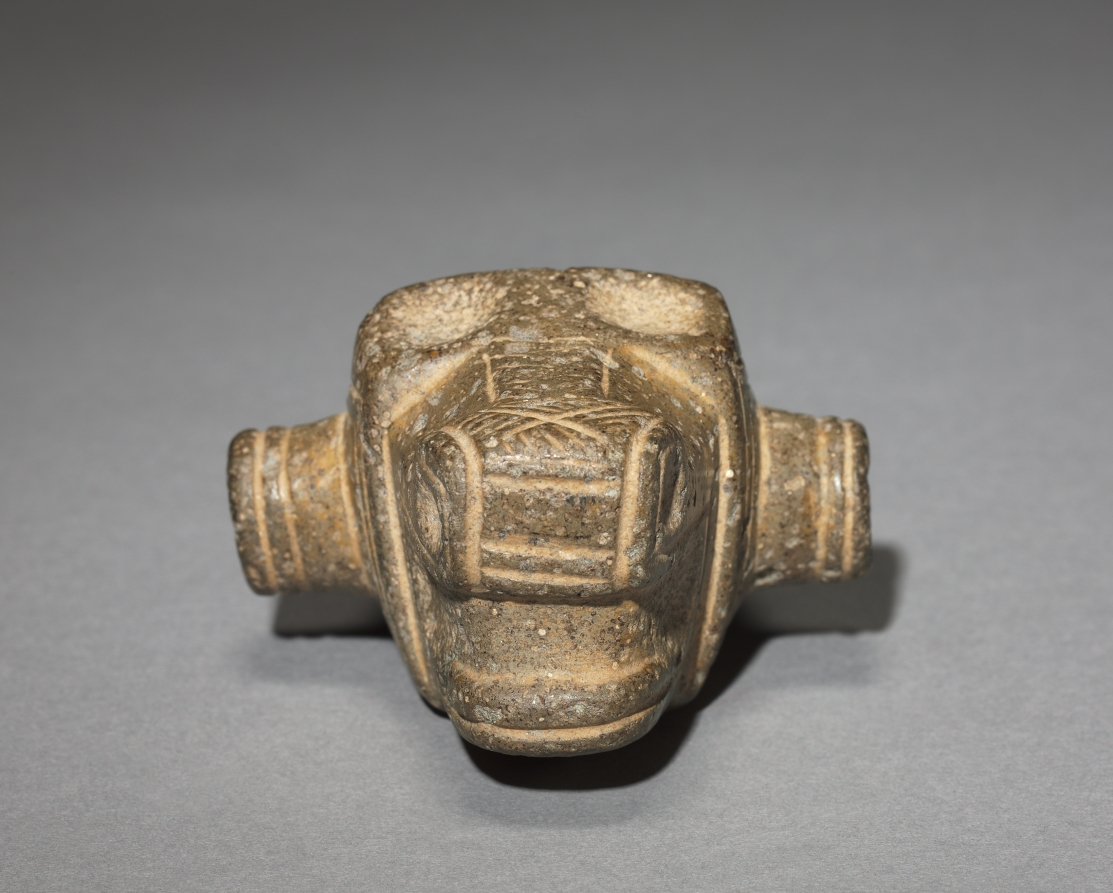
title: Mace Head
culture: Costa Rica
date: 300–500 CE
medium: pecked and polished gray stone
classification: Sculpture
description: Once mounted on wooden shafts, elaborately shaped mace (club) heads like this one probably were not used as weapons. Rather, they could have served as emblems of chiefly authority, group insignia, the heads of ceremonial weapons, or all three. They eventually were placed in elite graves. The back-curled nose on this example may refer to a crocodile or caiman.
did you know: In ancient Costa Rica, it was believed that the world rested on the back of a crocodile.